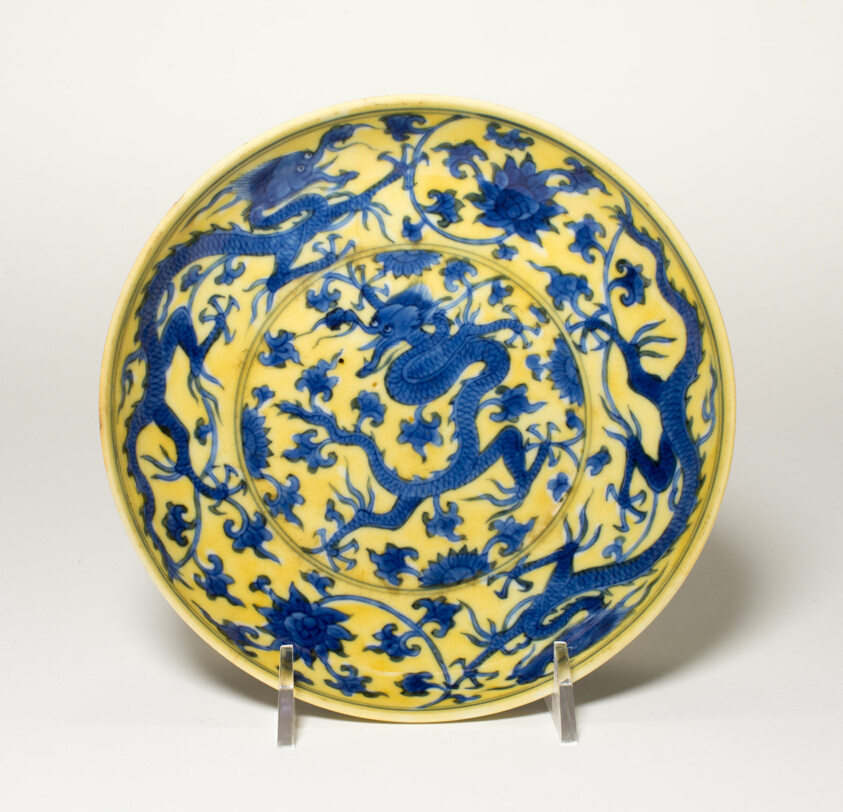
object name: Vessel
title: Dish with Dragons and Lotus Flowers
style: Chinese (culture or style)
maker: China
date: Qing dynasty (1644–1911), Kangxi period (1622–1722)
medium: Porcelain with underglaze blue and overglaze yellow enamel decoration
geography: China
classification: dish (vessel); porcelain; asian art; ceramics; vessel